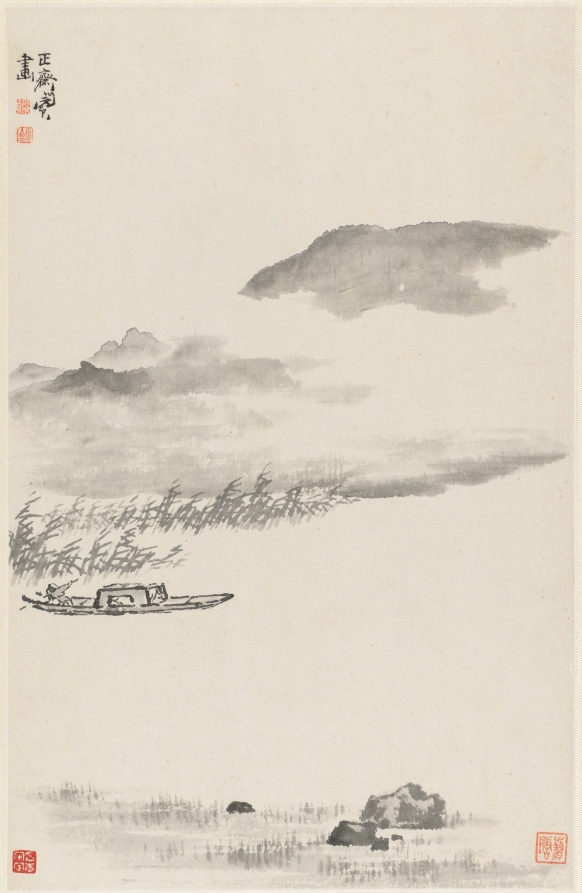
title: River Landscape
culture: China, Qing dynasty (1644-1911)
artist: Min Zhen (Chinese, 1730–after 1788)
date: 1788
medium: album leaf, ink on paper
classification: Painting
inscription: Inscription by Min Chen on the last leaf: I have a habit of collecting strange rocks. My friend Tai-li shan-jen* treasures my paintings as much as I treasure strange rocks. Once we agreed to exchange what we love with each other. However, my busy activities have kept me from carrying this out. This summer I realized that this strange rock has been sitting in my studio for five years, so I painted this to fulfill my old promise. As a record, I chose the grotesque cliff in the last scene of this twelve-leaf album. Cheng-chai, Min Chen inscribed this on the sixth day of the sixth month [July 9] of the wu-shen year [1788]. * Tai-li shan-jen is Wang Li [tzu: Li-fu] tr. Hou-mei Ishida Six seals appearing on the leaves: Min Chen, Cheng-chai, Ching-ch'iao, Chen, Liao-t'ang, Min Chen chih-yin.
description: Min Zhen, who was orphaned at age 12 and developed an eccentric personality, was trained by Tang Yin (1682–1756), a writer, playwright, and superintendent of the imperial porcelain workshops in Jingdezhen. The connection to him may have enabled Min to stay in Beijing for a decade from around 1773. It is not clear whether he ever resided in Yangzhou, but his style is in many instances reminiscent of that of Yangzhou artist Huang Shen. This album demonstrates Min’s versatility and mature style in the last years of his life.